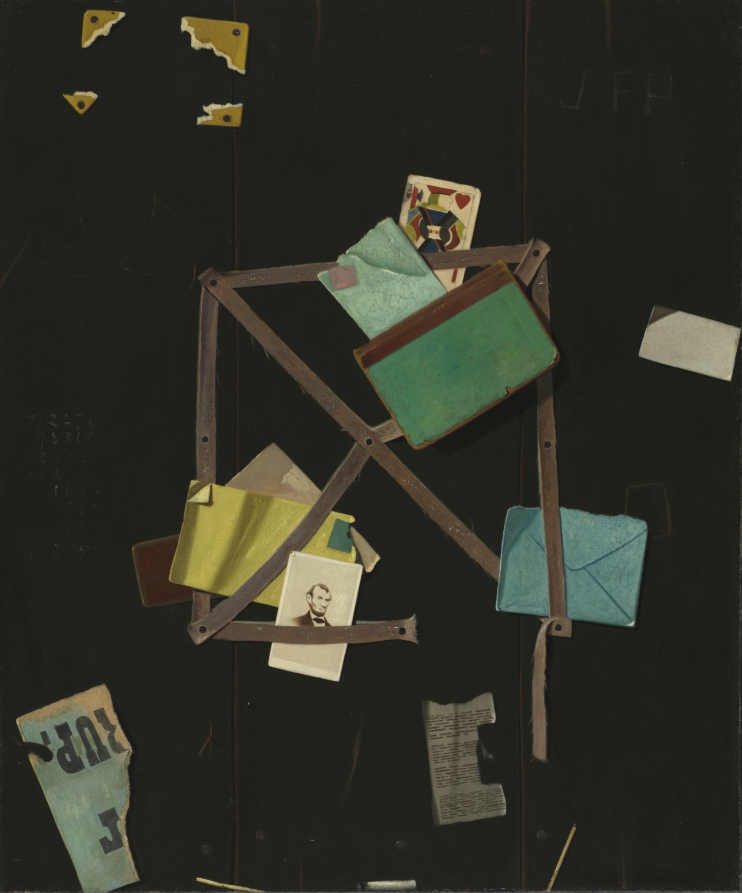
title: Card Rack with a Jack of Hearts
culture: America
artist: John F. Peto (American, 1854–1907)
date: c.1895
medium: oil on canvas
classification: Painting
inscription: Signed upper right: "J F P"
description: Like modern-day bulletin boards, card racks were used to gather newspaper clippings, scraps of paper, and other ephemera in one place. Although it is unclear if the items seen here carry symbolic meaning, they nevertheless demonstrate the human desire to collect and recollect. Their tattered state and frayed edges further evoke a sense of memory and nostalgia. The illusionistic quality of Peto’s pictures makes the objects appear to exist in real space. Even the cigarette butt perched at the bottom looks ready to be plucked from the painting’s frame.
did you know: Living in a New Jersey resort town, Peto sold some of his paintings to tourists.